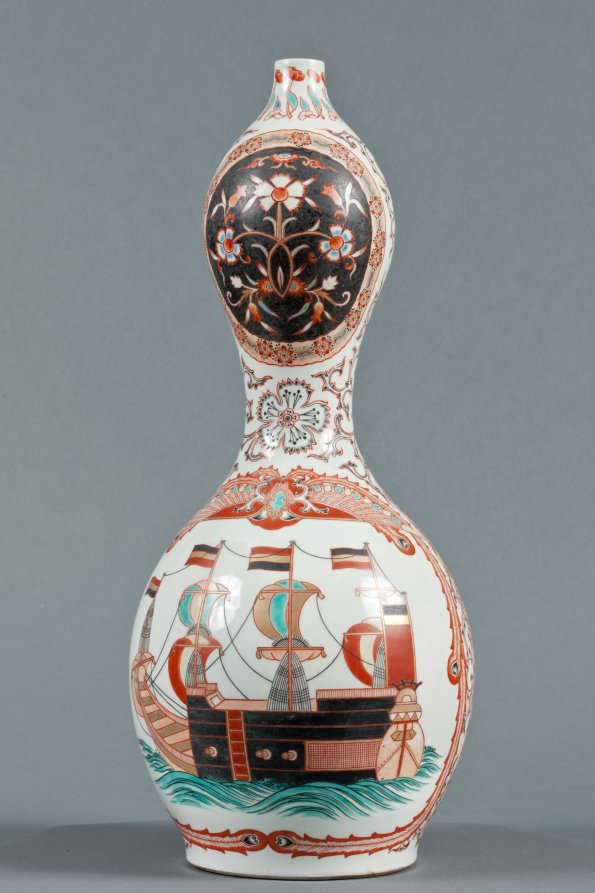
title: Bottle with Western Ships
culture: Japan, Edo period (1615–1868)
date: c. 1800–1868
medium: Porcelain with decoration in colored enamels and underglaze blue, overglaze enamels, and gold (Hizen ware, Arita type)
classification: Ceramic